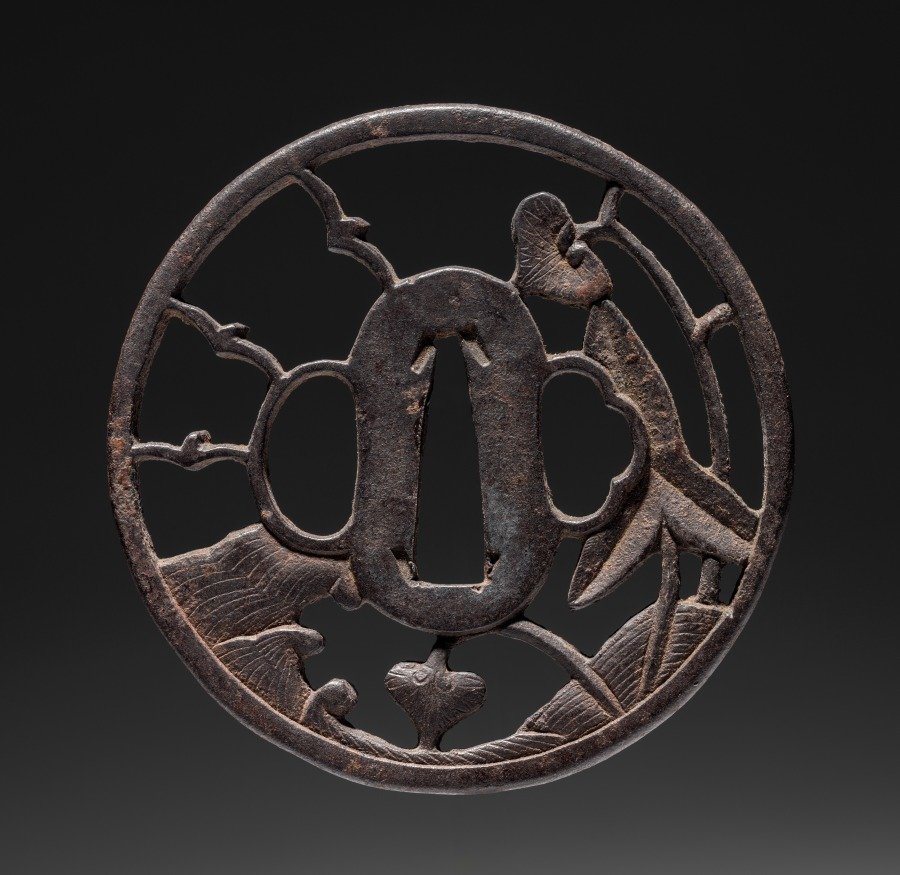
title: Sword Guard (Tsuba)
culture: Japan, possibly Edo period (1615–1868)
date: c. 1615–1868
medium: metal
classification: Arms and Armor